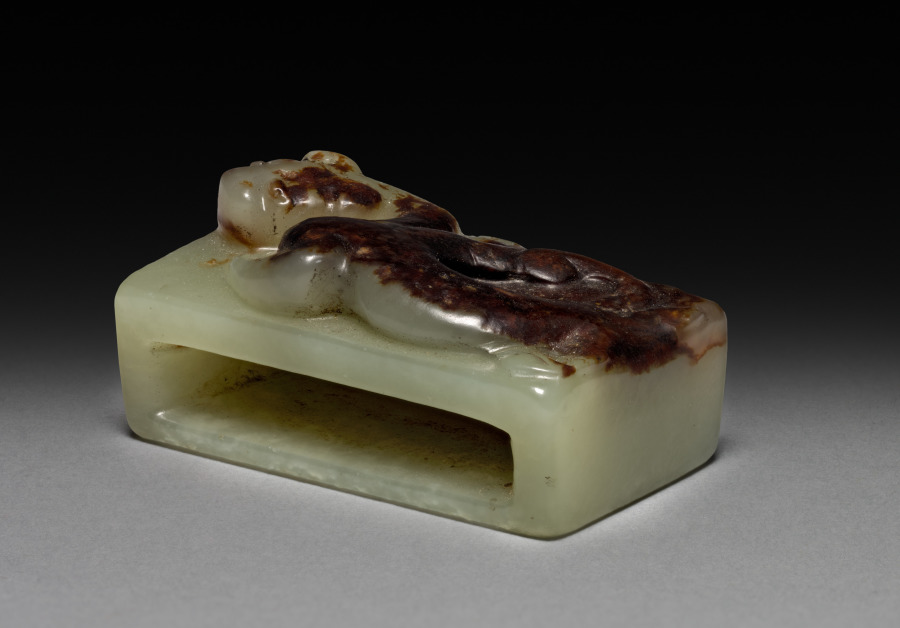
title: Scabbard Fitting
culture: China, Six Dynasties period (220–589 CE)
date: 317–581 CE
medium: jade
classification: Jade